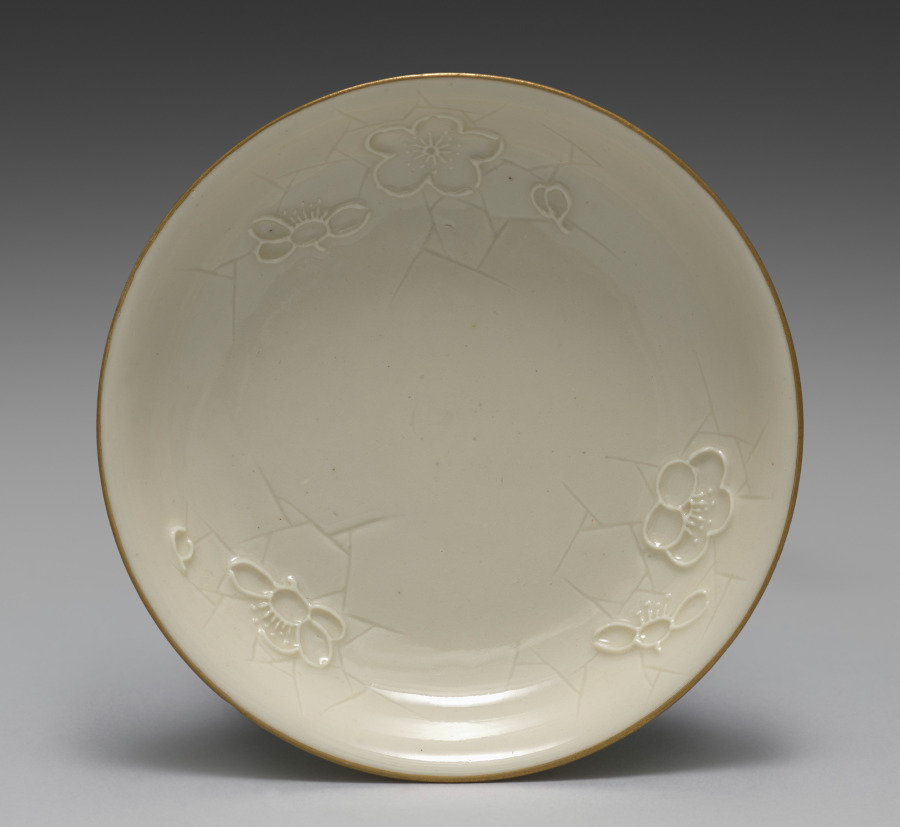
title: Small Dish from Dining Set with Plum Blossoms and Cracked-Ice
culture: Japan, Meiji period (1868–1912)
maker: Seifū Yohei II (Japanese, 1844–1878)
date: c. 1875–78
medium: Porcelain with molded designs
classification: Ceramic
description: Each item in this set has a delicate low-relief design of flowering plum branches over scattered, intersecting lines meant to resemble the cracked-ice surface of a frozen body of water and is signed on the base in gold pigment. While Yohei II produced many fine works in underglaze blue, like those produced by Kiyomizu Shichibei, he also made works in quite different styles later in his career, from the early 1870 s. In 1873, he was appointed purveyor to the Industrial Center of Kyoto Prefecture, a designation associated with Kyoto’s efforts to reach an international market through the port of Kobe; and from 1875 until his death, he was involved in national-level projects to present Japanese ceramics across the world. It was during this period that Yohei III was apprenticed to Yohei II, and it has been suggested that this set may in fact be an early example of Yohei III’s work, which he signed with his teacher’s name. Decorated with flowers resembling Japanese textile motifs, the set calls to mind the design of Yohei II’s pair of vases with plum blossoms in the Victoria and Albert Museum. Here, the elaborate trees created for a formal public exhibition setting have been translated into the approachable blossoms of the genteel domestic environment. While the designs are consistent across the pieces, each raised flower petal and pistil and each incised line in the ice was done by hand, so the cups, bowls, and dishes are similar yet unique. The bottoms of two boxes once identified the set’s owner, but the information has been deliberately obscured with black ink. However, inscriptions still visible appear to indicate two occasions, once at the end of July 1886 , and once again in June 1916 , when parts of the set were requested from Hokura in Niigata Prefecture. The location corresponds to a neighborhood in the present-day city of Jōetsu. The surname Tsuji 辻 also appears on a paper tag affixed to one of the box cloths. Future research may possibly reveal more about their provenance. A vase by Yohei III in a private collection combines the formal grandeur of the Yohei II vases in the Victoria and Albert Museum with the gentler design of this dining set, placing flowering plum trees against soft, scalloped-edge clouds resembling those in golden screens.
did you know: The dining wares have a creamy white coloration that the four boxes containing them identify as Korean in style.